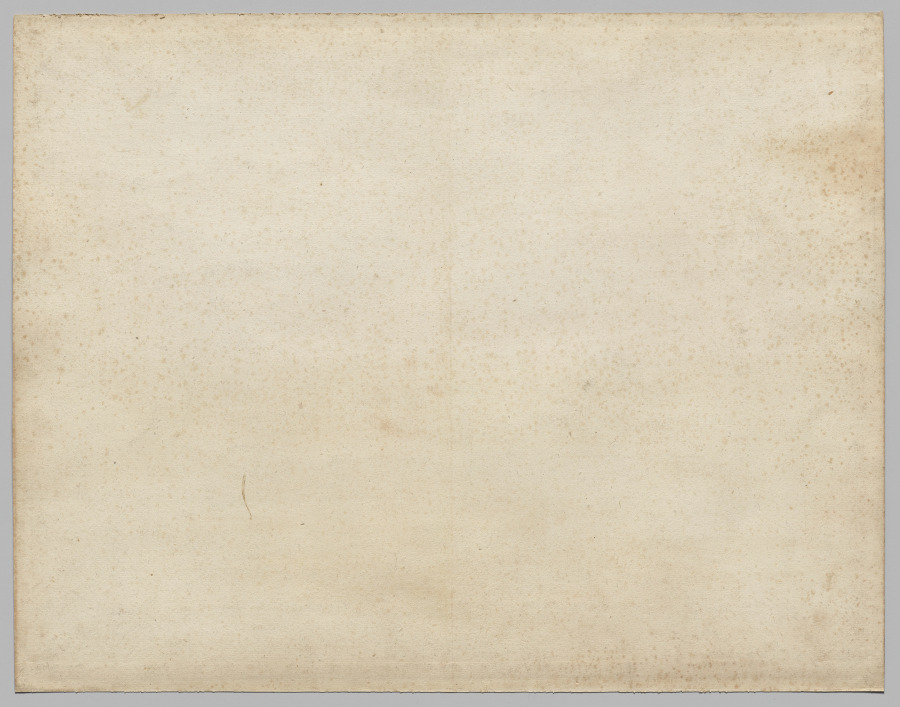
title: A View of the Ruins of the Baths of Caracalla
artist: Giovanni Battista Lusieri (Italian, 1750–1825)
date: 1779–81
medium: graphite, pen and black ink, watercolor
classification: Drawing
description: Lusieri was known among his Grand Tour patrons for his meticulous technique and his originality: for example, his choice of an unusual view of the Baths of Caracalla, as here, taken from within the ancient site. With an astonishing commitment to the truthful depiction of nature and ruins, and an extreme awareness of the nuances of light at different times of day, he depicted the ruins in the late afternoon. The presence of figures emphasizes the massive scale of the ruins in the warm Italian sun in this significantly large, impressive sheet, a welcome souvenir to his patron, an English Lord, when he returned to England.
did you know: The artist Lusieri accompanied the British Lord Elgin to Athens in the late 1790s and participated in the dismantling of the Parthenon’s metope sculptures there, now famously called the Elgin marbles.